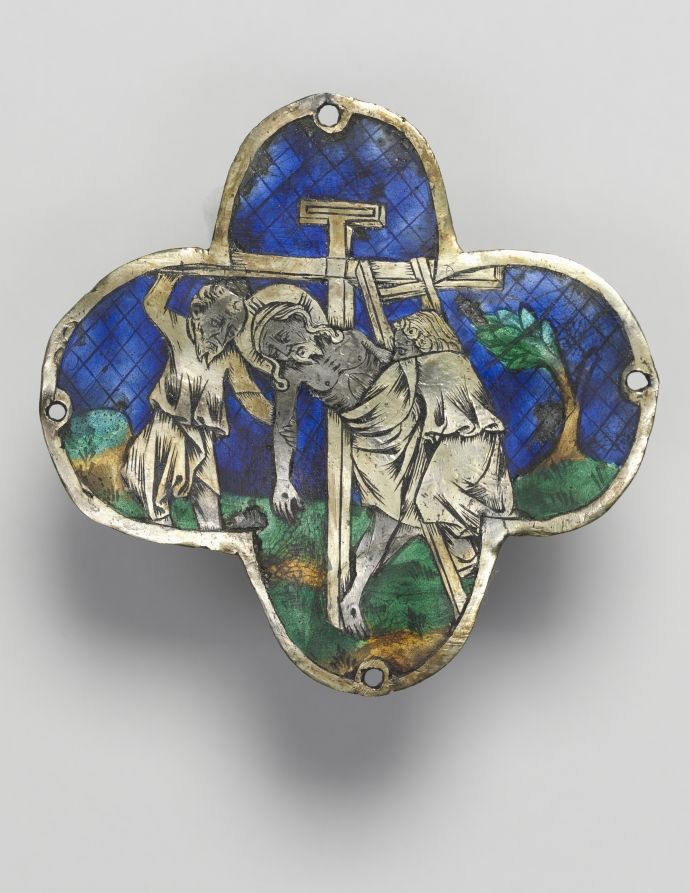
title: Quatrilobed Plaque: The Descent from the Cross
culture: Spain, Catalonia?, 14th century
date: c. 1350–1400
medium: translucent enamel (basse-taille) on silver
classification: Enamel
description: These plaques were probably originally placed at the end of the arms of a processional cross. They are decorated in an enameling technique called basse-taille in which colorful translucent enamel pastes are fused over an engraved and chased silver plaque.